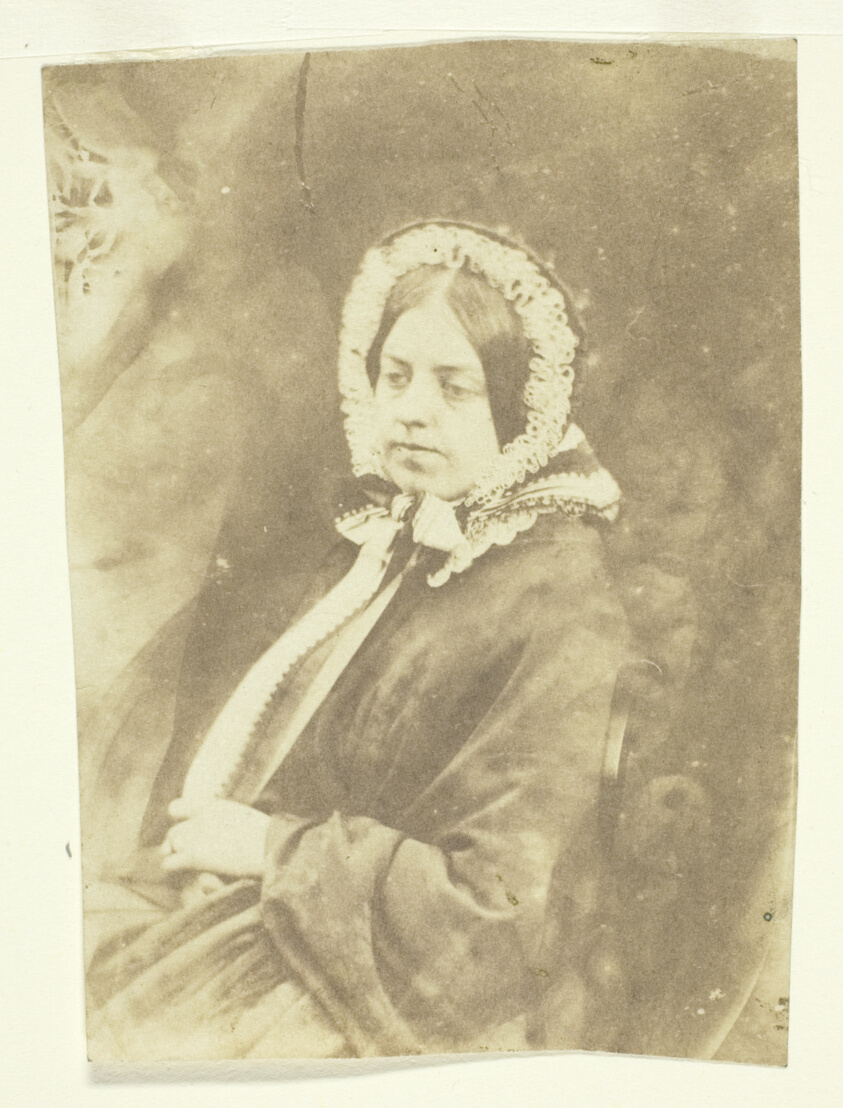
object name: Photograph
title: Mrs. Craik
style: 19th century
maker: Artist unknown, possibly Benjamin Mulock (English, 1829–1863); English, 19th century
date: 1850/65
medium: Calotype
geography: England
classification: salted paper print; photographic process; photography; photograph